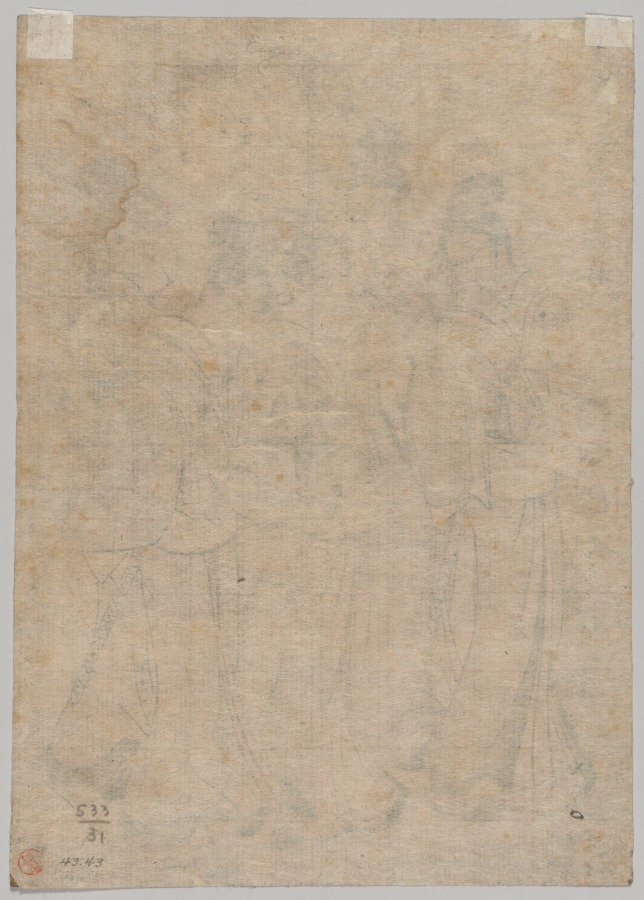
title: Young Women with Musical Instruments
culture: Japan, Edo period (1615–1868)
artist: Kikukawa Eizan (Japanese, 1787–1867)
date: 1787–1867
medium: color woodblock print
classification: Print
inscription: Signature: Kikugawa Yeizan fude